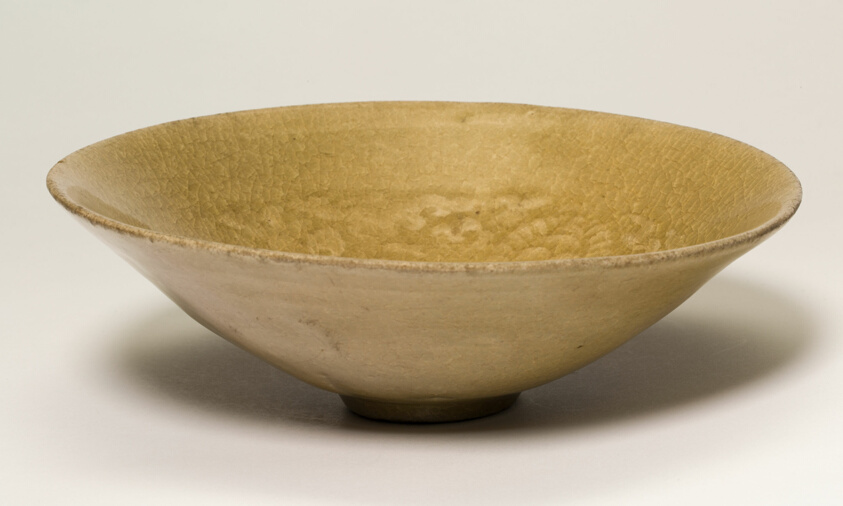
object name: Vessel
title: Bowl with Floral Scrolls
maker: Korea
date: Goryeo dynasty (918–1392)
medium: Celadon-glazed stoneware with underglaze molded decoration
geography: Korea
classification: porcelain; ceramics; asian art; vessel